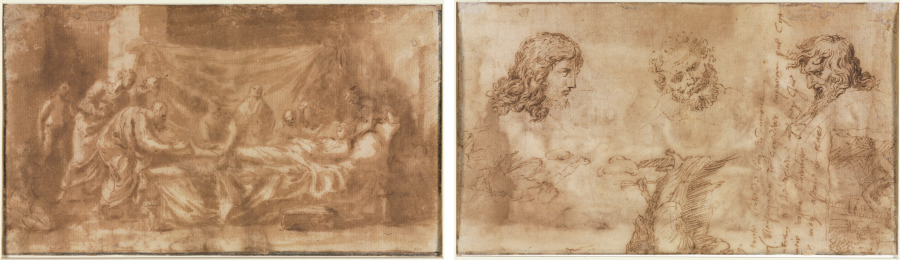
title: Extreme Unction (recto); Three Heads and Other Sketches (verso)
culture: France, 17th century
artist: Nicolas Poussin (French, 1594–1665)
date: 1643–1644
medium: pen and brown ink and brush and brown wash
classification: Drawing